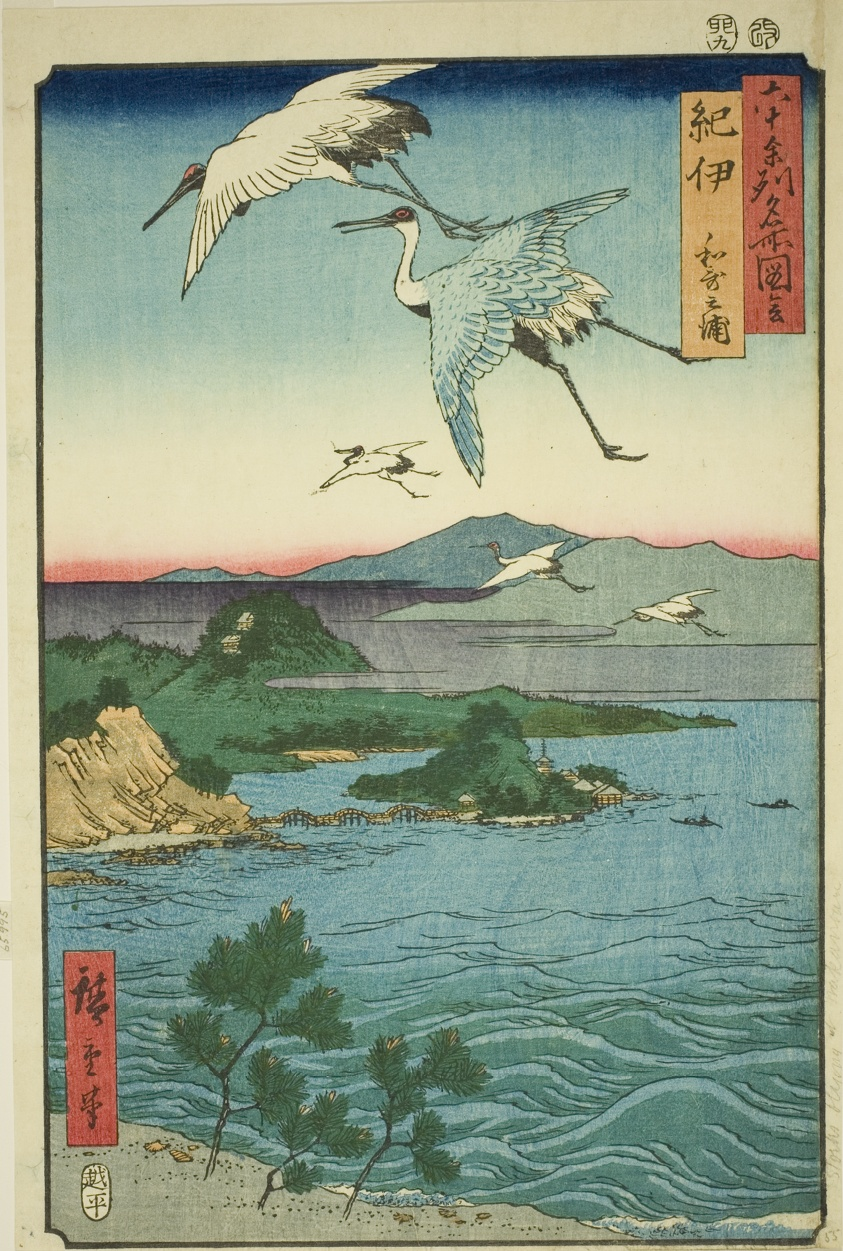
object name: Print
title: Kii Province: Wakanoura Bay (Kii, Wakanoura), from the series "Famous Places in the Sixty-odd Provinces (Rokujuyoshu meisho zue)"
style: Japanese (culture or style)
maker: Utagawa Hiroshige 歌川 広重; Japanese, 1797-1858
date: 1855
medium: Color woodblock print; oban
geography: Japan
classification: woodblock print; print; asian art